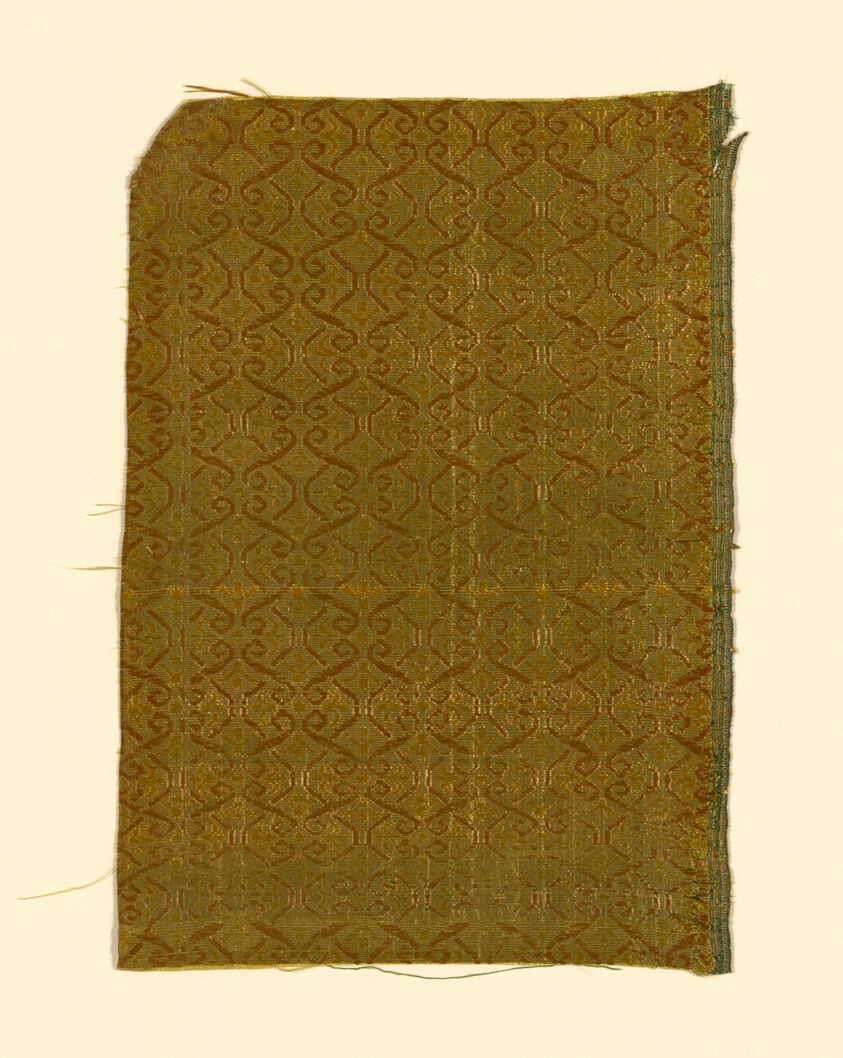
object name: Textile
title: Fragment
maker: Italy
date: 1625/75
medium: Silk, warp-faced weft-ribbed plain weave self-patterned by complementary ground weft floats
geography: Italy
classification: textile; weaving